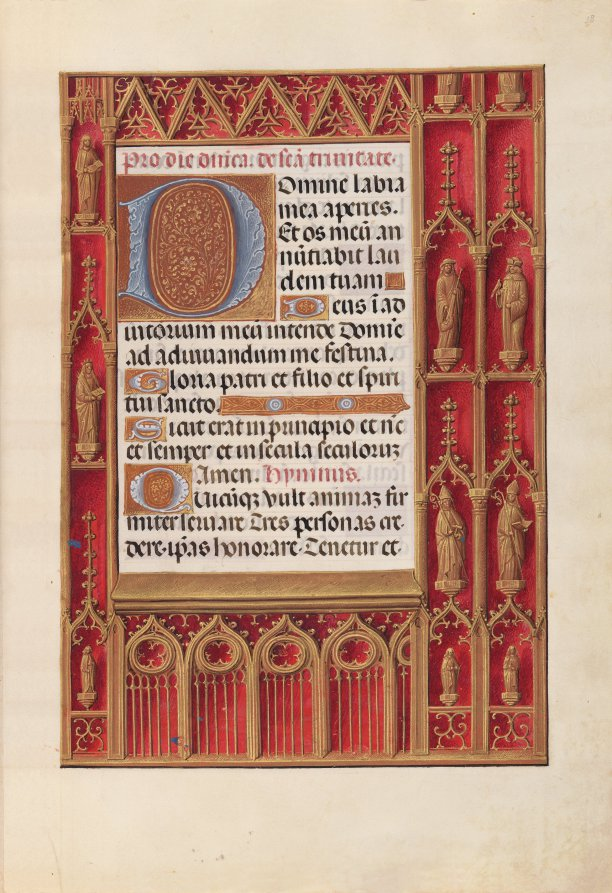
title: Hours of Queen Isabella the Catholic, Queen of Spain: Fol. 18r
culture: Flanders, Ghent and Bruges, late 15th century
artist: Master of the First Prayerbook of Maximillian (Flemish, c. 1444–1519)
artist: and Associates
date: c. 1500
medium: ink, tempera, and gold on vellum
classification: Bound Volume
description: This manuscript was illuminated by a circle of at least five highly organized manuscript painters active in the Flemish cities of Ghent and Bruges. The principal illuminator was Alexander Bening, who painted the majority of the book's miniatures. Manuscripts produced by this circle of artists are renowned for the decoration of their borders, which typically feature a rich variety of realistically-painted flowers, birds, and butterflies. This prayer book, called a book of hours, was intended not for a cleric, but for the private devotions of a lay person-in this case, Isabella the Catholic, Queen of Spain (1451-1504). Isabella's coat of arms embellishes the book's frontispiece. It is unlikely that the book was commissioned by the Queen herself; rather, she probably received it as a diplomatic gift from someone courting her patronage, perhaps Cardinal Francisco Jimenez de Cisneros. A Franciscan friar, Jimenez was dependent upon Isabella for his advancement, first to the post of Queen's confessor in 1492, and then to Archbishop of Toledo in 1495.